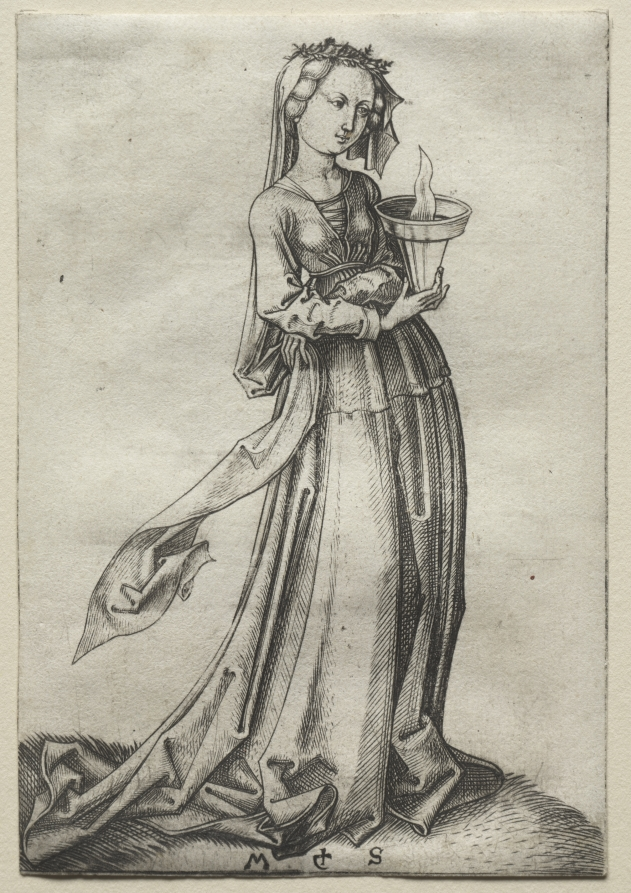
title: The Fourth Wise Virgin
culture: Germany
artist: Martin Schongauer (German, c. 1450–1491)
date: 1469–79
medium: engraving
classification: Print